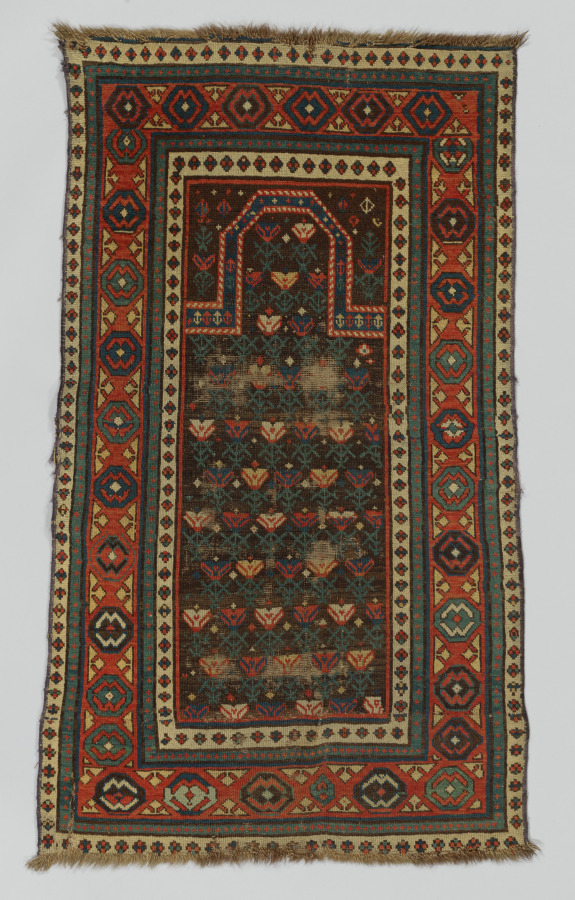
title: Carpet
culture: Iran, Shirvan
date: 1800s–1960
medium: Wool and cotton: Ghiordez knot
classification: Carpet